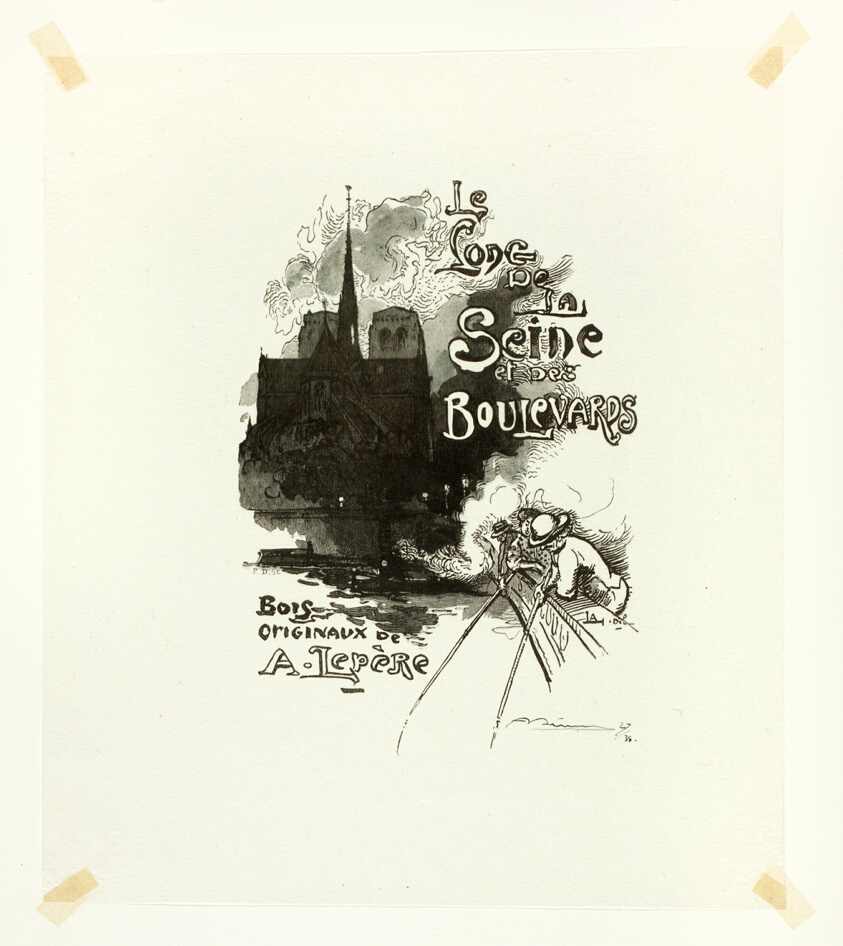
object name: Print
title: Frontispiece to Le Long de la Seine et des Boulevards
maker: Pierre Desmoulins (French, active c. 1910); after Louis Auguste Lepère (French, 1849-1918); published by A. Desmoulins (French, active c. 1908-1910)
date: 1910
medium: Wood engraving in black on cream Japanese tissue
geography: France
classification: wood engraving; print; prints and drawing